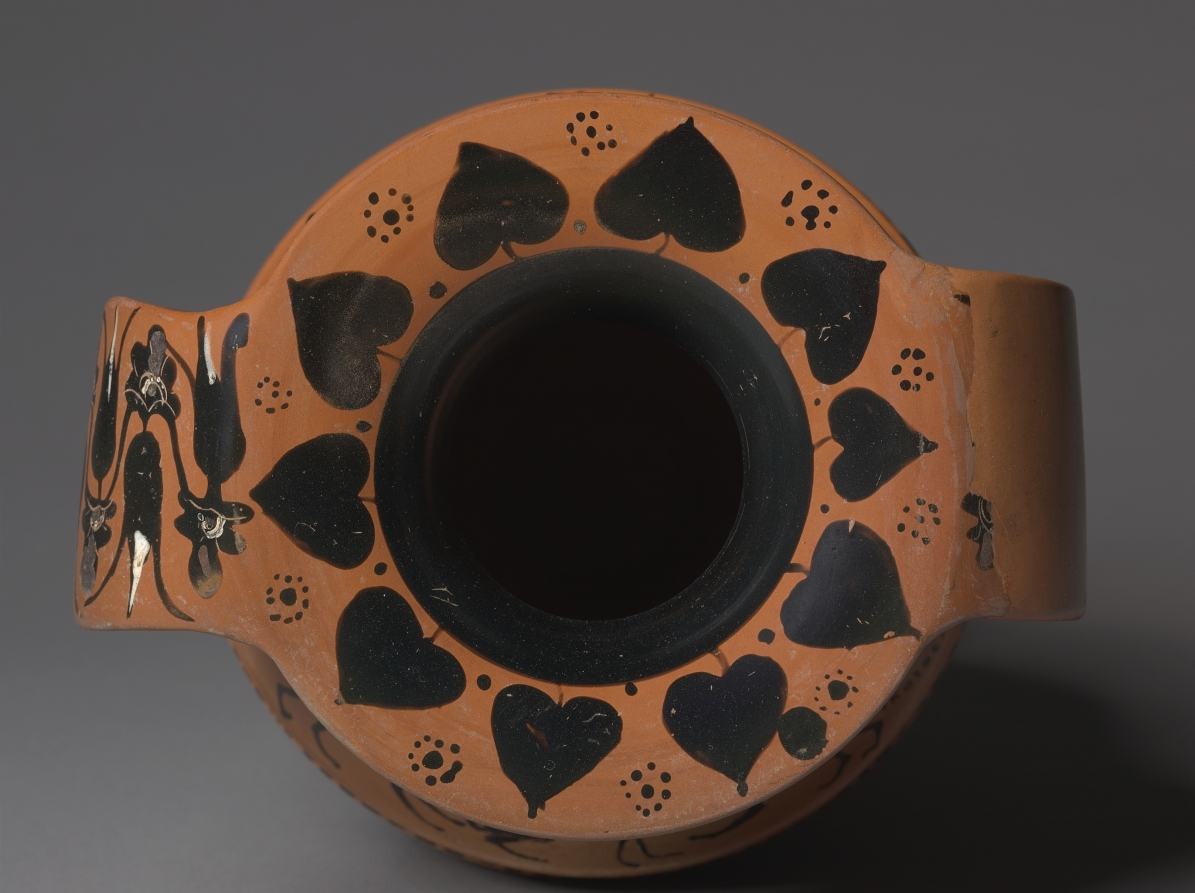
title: Black-Figure Nikosthenic Amphora (Storage Vessel): Dancing Youths; Sphinxes and Lions; Satyrs and Maenads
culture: Greek, Attic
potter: signed by Nikosthenes (Greek, Attic, active c. 545–510 BCE)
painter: attributed to Painter N, Thiasos Group (Greek, c. 530–510 BC)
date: c. 530–510 BCE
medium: ceramic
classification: Ceramic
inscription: inscription Under handle A/B:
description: The distinctive shape of this amphora—wide strap handles, conical neck, and ribs running around the upper body—is a trademark of the potter Nikosthenes, who signed his name below the partially restored handle (together with the verb EPOIESEN, for “made”). Nikosthenes signed nearly 150 surviving vases, more than any other named potter or vase-painter. Made in Athens with an Etruscan clientele in mind, Nikosthenic amphorae emulate precious metal and ceramic bucchero vases made in Etruria (central Italy), where many examples have been discovered. The painted figures include dancing youths (on the neck), sphinxes between lions (on the shoulder), and a continuous procession of dancing satyrs alternating with women (on the body).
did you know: The painter of this vase decorated nearly every available surface; the undecorated handle section is modern.